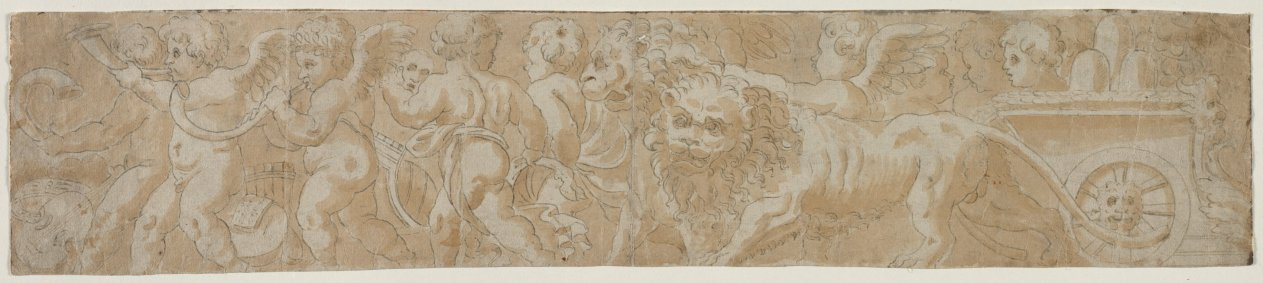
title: Chariot Drawn by Lions with Amorini (recto)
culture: Italy, 16th century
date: first half 1500s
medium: pen and brown ink and brush and brown wash over black chalk; framing lines in brown ink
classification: Drawing